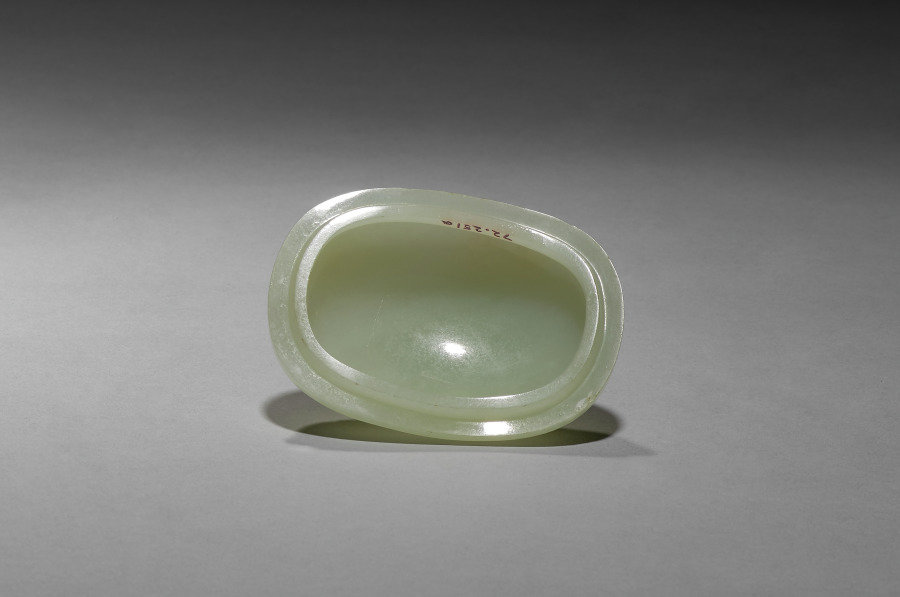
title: Pitcher (Gong) with Dragon and Bird-Headed Handle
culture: China, Qing dynasty (1644–1911)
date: 1700s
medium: pale greenish-white jade with brown markings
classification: Jade